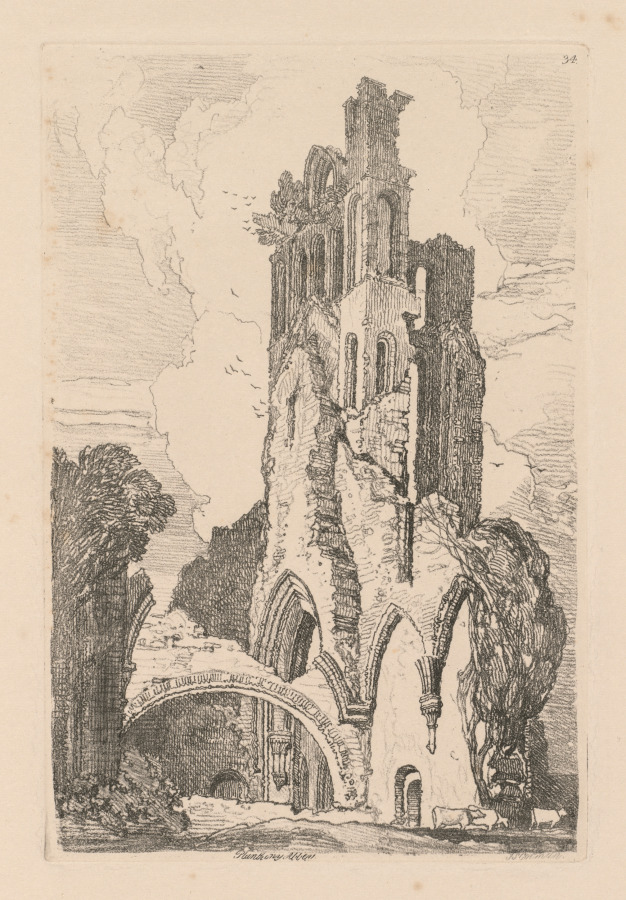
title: Liber Studiorum: Plate 34, Llanathony Abbey, Monmouthshire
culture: England, 19th century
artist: John Sell Cotman (British, 1782–1842)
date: 1838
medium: softground etching, from a bound volume containing 48 plates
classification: Bound Volume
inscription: In plate, within image, upper right: 34; in plate, below image: Planathony Abbey JS Cotman